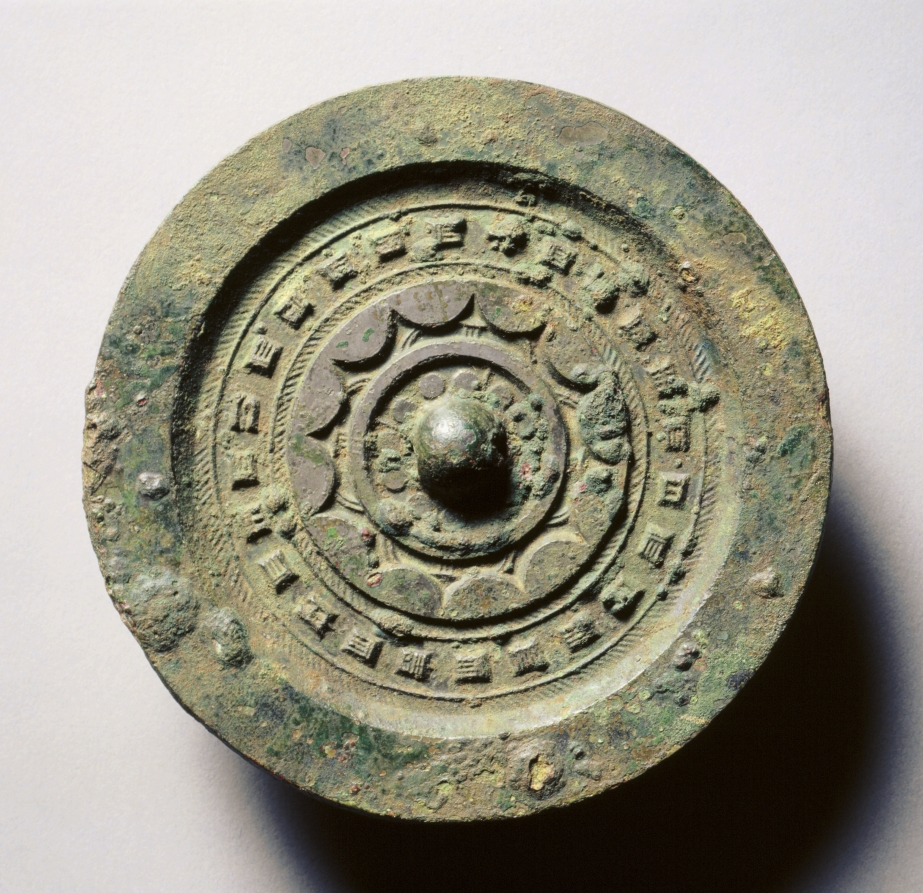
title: Mirror with Concentric Circles and Linked Arcs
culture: China, Western Han dynasty (206 BCE–8 CE)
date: late 300s BCE–50 CE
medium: bronze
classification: Metalwork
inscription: Its inner purity is shown in perfect reflection. Its light is the image of the sun and moon. . .